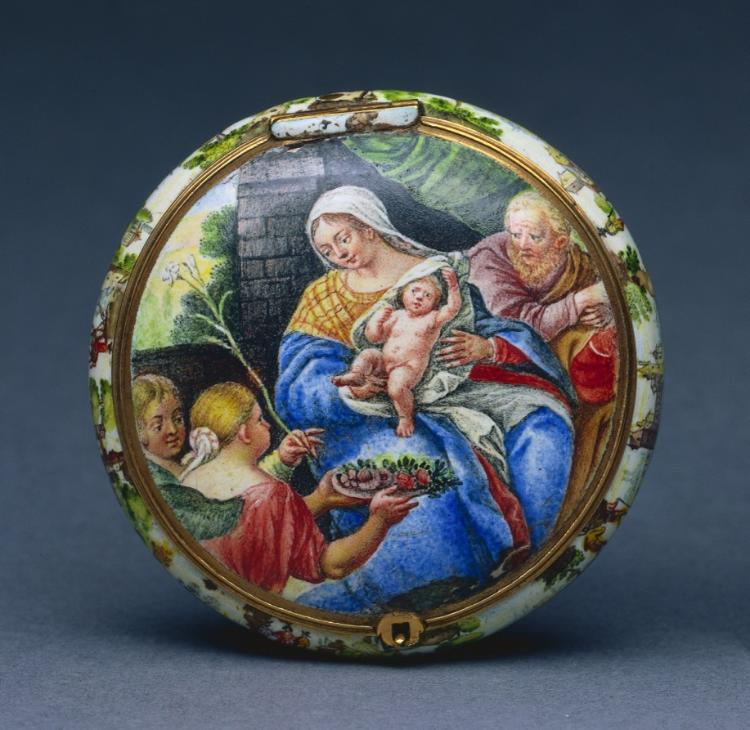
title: Watchcase (Boîtier de montre)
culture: France, 17th century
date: c. 1640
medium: gold and enamel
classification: Jewelry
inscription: [engraved on the rim]: "B8"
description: In the 1630s, the practice of painting with enamel on metal became a means for French miniature painters to achieve a more richly colored, durable product. Previously miniatures were painted with watercolor on vellum, a material made from animal skin. This case would have originally held a watch, but was later transformed into a simple box through the removal of the watch mechanism and ring. This watch case is richly painted inside and out with miniatures modeled after well-known religiously allegorical works.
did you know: Inspiration for the box’s miniatures was drawn from works by Peter Paul Rubens’ The Holy Family with Saints John the Baptist and Elizabeth (1615) (back panel) and Nicolas Cochin (interior base).